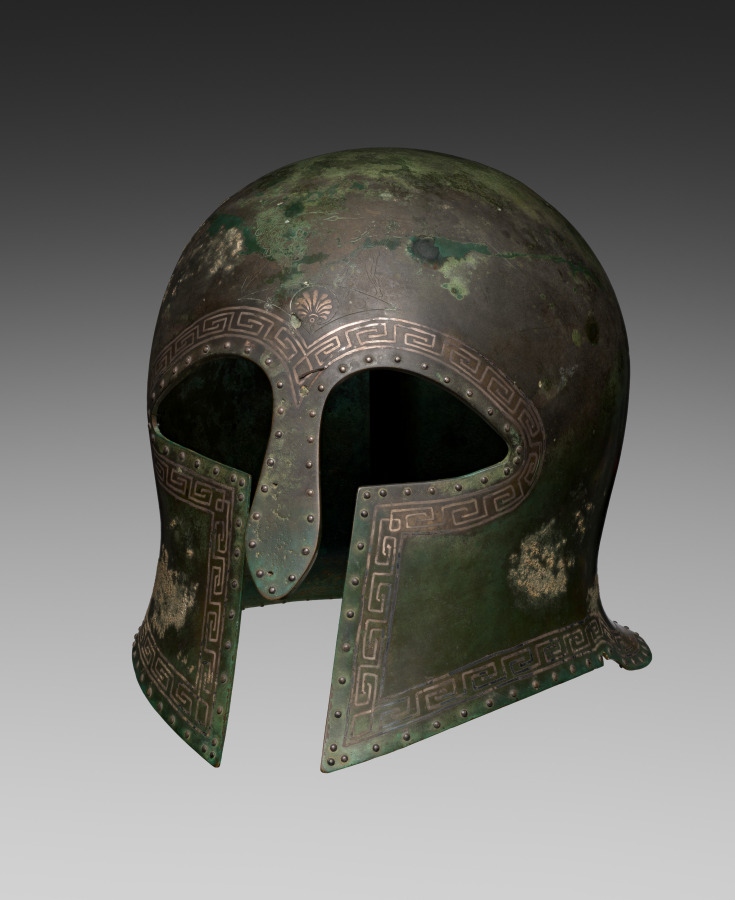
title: Corinthian Helmet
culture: Greece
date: 500–475 BCE or modern (before 1926)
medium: bronze with silver inlay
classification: Arms and Armor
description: Probably cast and then hammered into shape, this bronze helmet belongs to a type known as Corinthian, with almond-shaped eye holes, large cheekpieces, and a wide nose guard. Its significant weight raised early suspicions about authenticity, and although a 1928 technical examination found no conclusive evidence of forgery, scholars have continued to doubt its antiquity. Unusual details include the intact rivets, or metal fasteners, meant to secure liners; usually only their holes survive. The dueling warriors and inlaid palmette above the brow also find few parallels, and the silver meander pattern is unique. Most recently, a 2024 analysis found that both the copper and silver alloys of the helmet differ significantly from those expected in an ancient Greek helmet.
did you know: This helmet is very heavy—2.56 kilograms (5 lbs., 10 oz.), compared to average ancient helmets of 1.2–1.6 kilograms (about 3 lbs.).